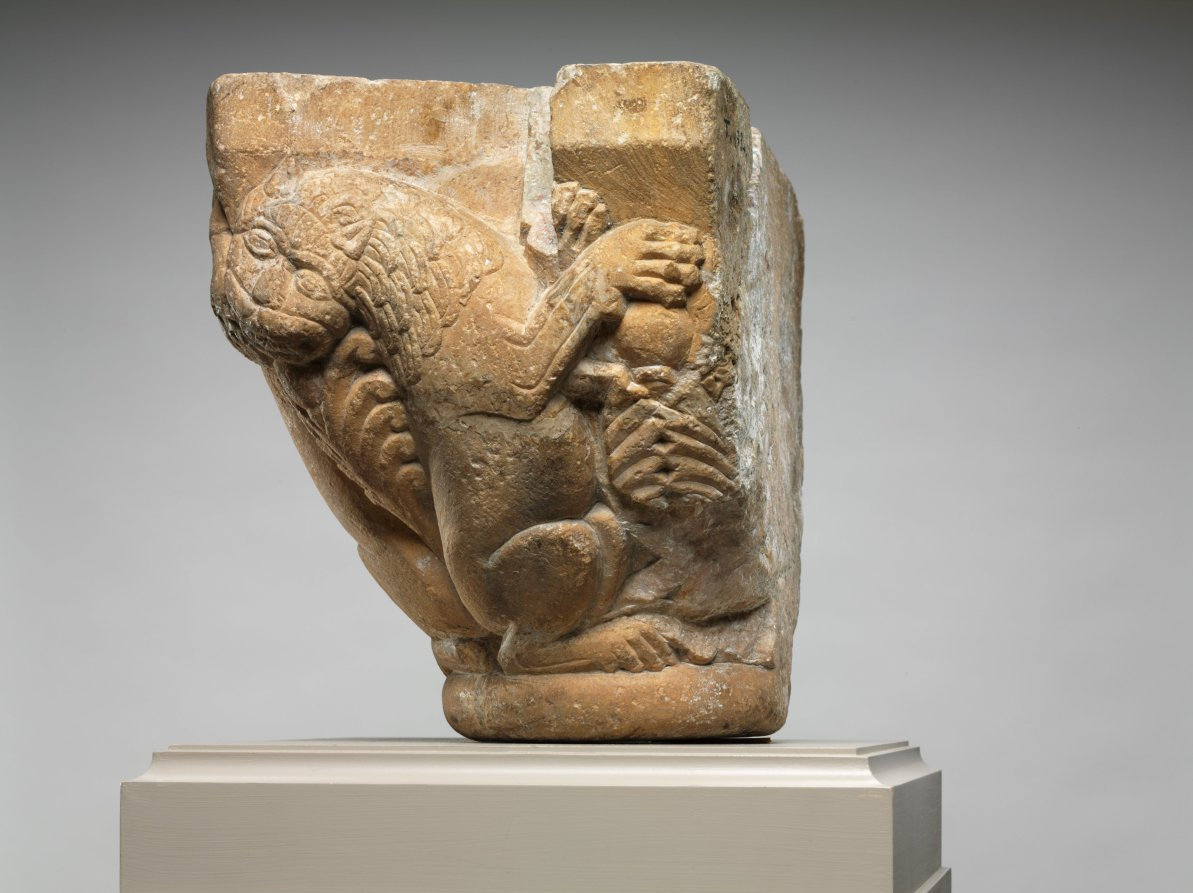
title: Engaged Capital with Lions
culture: Northern Spain (Navarre ?) or Southwest France (Pyrénées or Roussillon ?), mid-12th century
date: 1145–64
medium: marble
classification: Sculpture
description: The compositional motif of confronted and addorsed beasts illustrated on this capital was especially popular in churches along the pilgrimage roads.